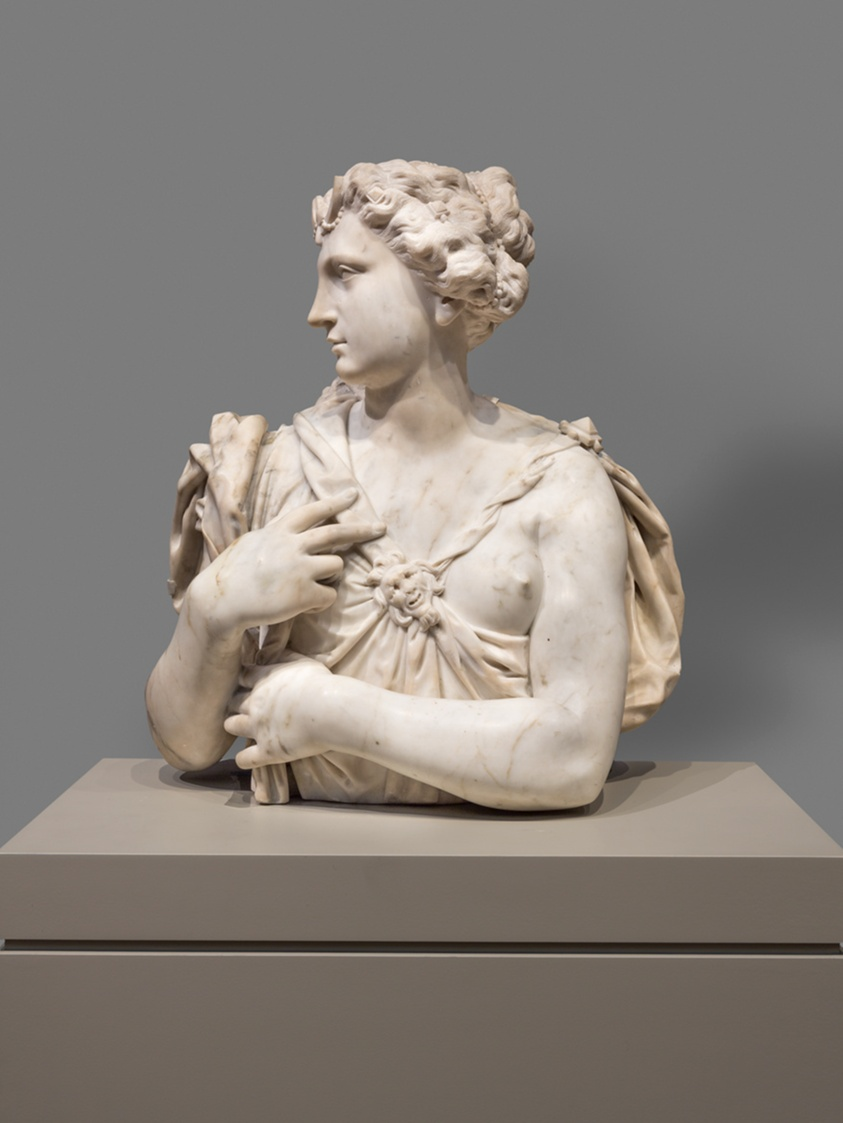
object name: Sculpture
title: Bust of Diana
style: 17th Century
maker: Giuseppe Mazza (Italian, 1653–1741)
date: c. 1692–93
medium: Marble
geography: Italy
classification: bust/head; sculpture; Italian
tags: diana, Greek mythology, Greek gods, busts, diety, goddesses, gods (deities), head, mythical, mythological figures, mythology, woman